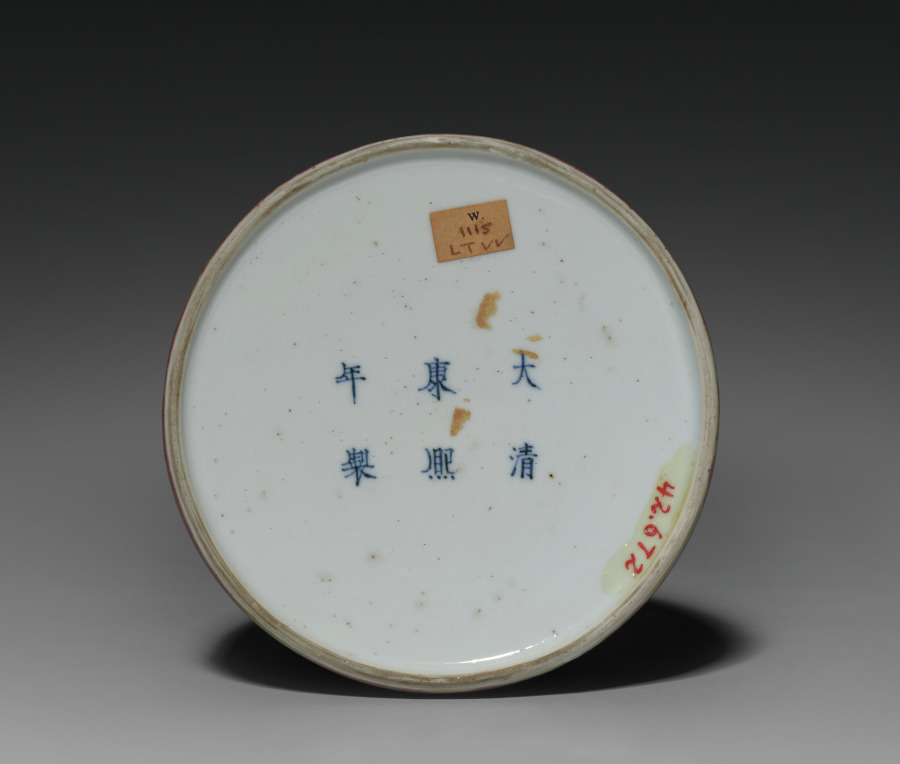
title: Water Pot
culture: China, Jiangxi Province, Jingdezhen, Qing dynasty (1644–1911), Kangxi period (1662–1722)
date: 1662–1722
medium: porcelain with "peach bloom" glaze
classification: Ceramic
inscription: 大清康熙年制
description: The "peach-bloom" glaze developed during the Kangxi era has been described as "drunken with beauty." The water pot's glaze is in shades ranging from red to grayish rose. The interior and base are covered in white glaze.